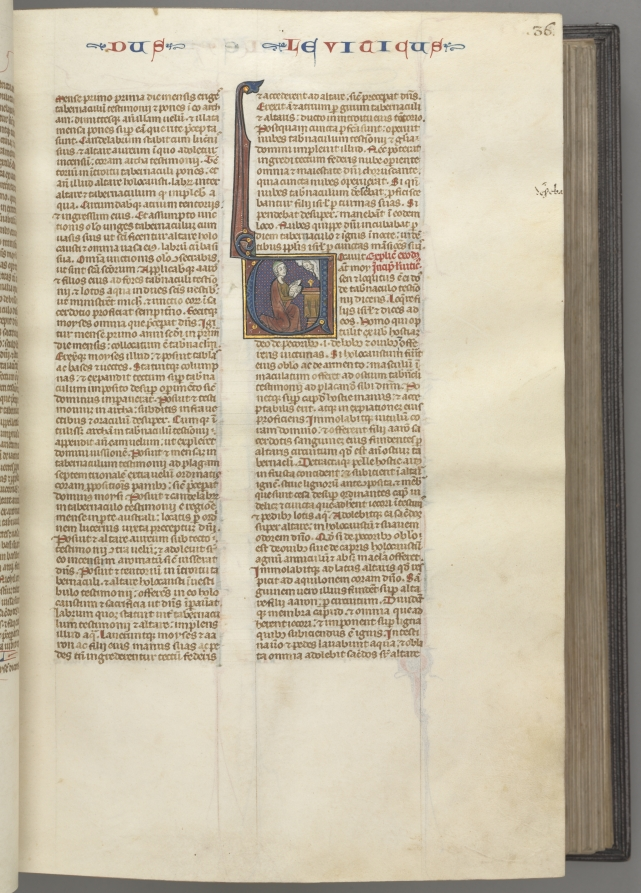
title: Fol. 36r, Leviticus, historiated initial V, Moses offering a sacrificial lamb on an altar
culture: Southern France, Toulouse(?), 13th century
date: c. 1275–1300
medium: ink, tempera and gold on vellum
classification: Bound Volume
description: Biblical manuscripts were highly prized and important possessions of churches, monasteries, cathedral schools, and universities throughout medieval Europe. The biblical texts were known as the vulgate, the translations made by Saint Jerome in the fourth century from Hebrew and Greek into Latin, which became the definitive and official Latin version of the Roman Church. In the 13th century, the bible was, for the first time, produced as a single volume with an officially sanctioned sequence to its books and chapters as illustrated by this example. The very extensive decoration of this bible is arranged hierarchically to indicate the relative importance of the various texts so that full or almost full-page initials mark the openings of the first prologue, Genesis, and the first Gospel; historiated initials mark the beginning of each book and illuminated initials mark the Prologues.